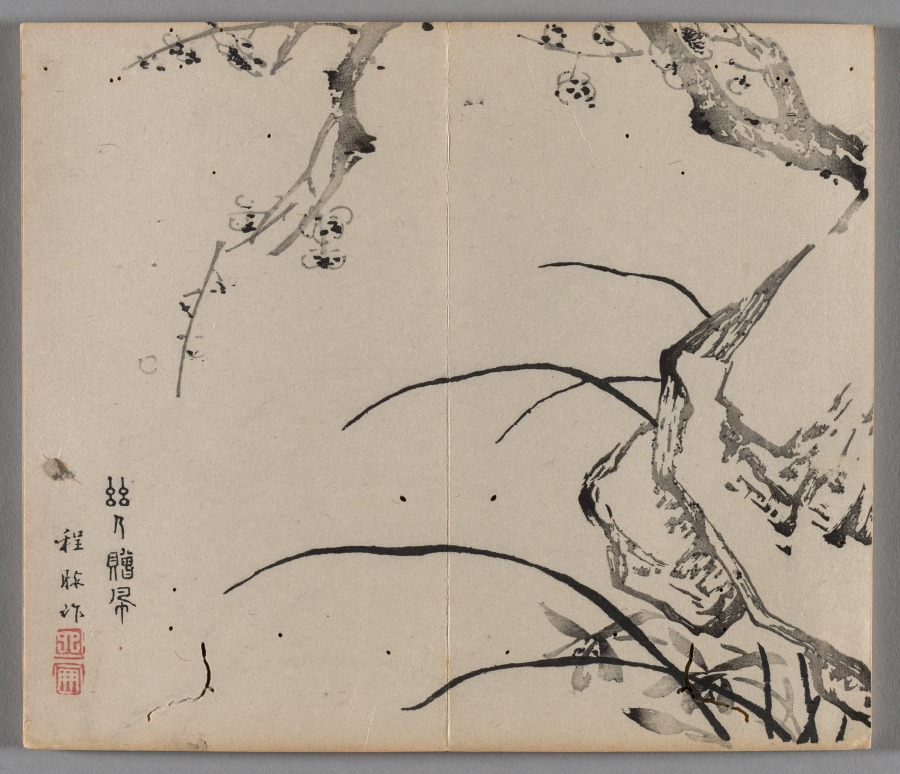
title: Ten Bamboo Studio Painting and Calligraphy Handbook (Shizhuzhai shuhua pu): Plum Blossoms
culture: China, Qing dynasty (1644-1911)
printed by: Hu Zhengyan (Chinese, c. 1584–1674)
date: 1633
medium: Woodblock-printed book; ink and colors on paper; first edition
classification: Print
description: Color printing reached a level of perfection in the early 1600s, as seen in this Ten Bamboo Studio Collection of Calligraphy and Painting and the Mustard Seed Garden Manual of Painting (printed 1679 and 1701). The painterly quality, precision in registering (aligning) the woodblocks, and harmonious colors made them the most successful color print editions in Chinese history. Both editions were printed and compiled in Nanjing, spread nationwide, and had a great impact on the arts in Japan and Korea.